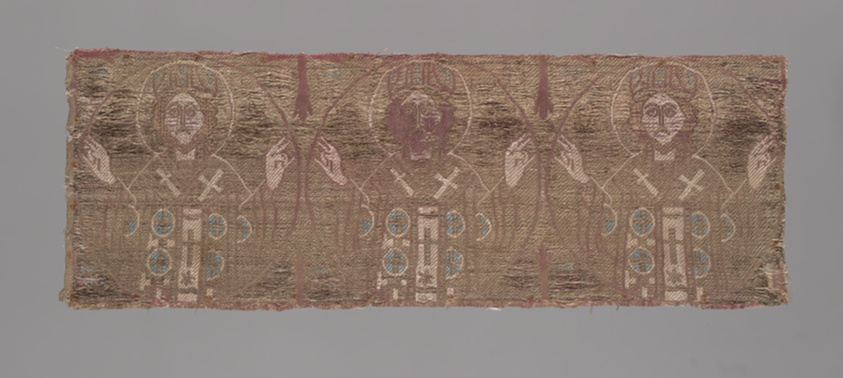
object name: Textile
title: Fragment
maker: Armenia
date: 16th century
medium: Silk and gilt-metal-strip-wrapped silk, warp-float faced satin weave with weft-float faced twill interlacings of secondary binding warp and supplementary patterning wefts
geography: Armenia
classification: textile; weaving